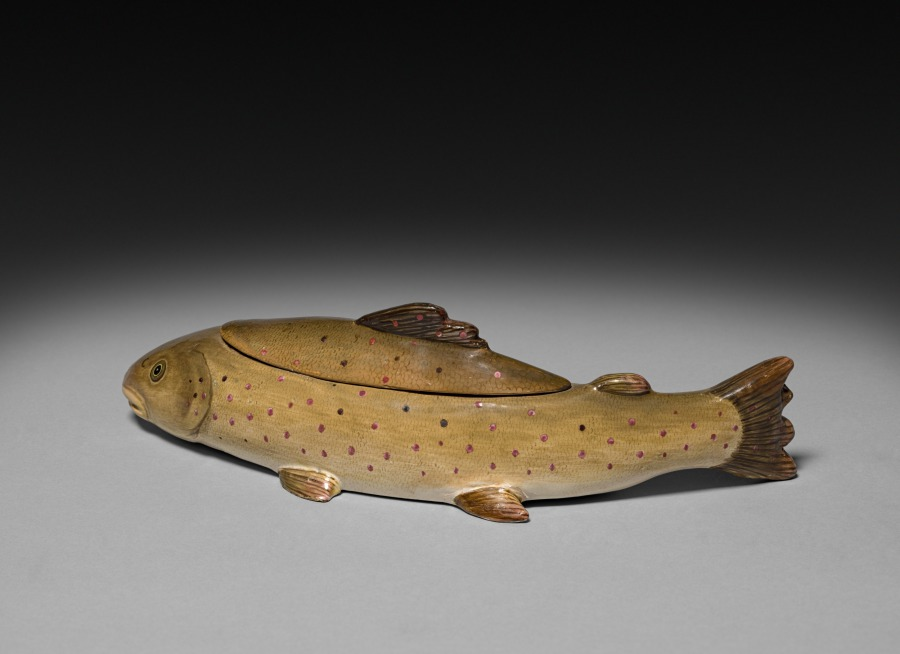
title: Box in the Form of a Fish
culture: France, Niderviller, 18th century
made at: Niderviller Factory (French)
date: 1767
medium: ceramic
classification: Ceramic